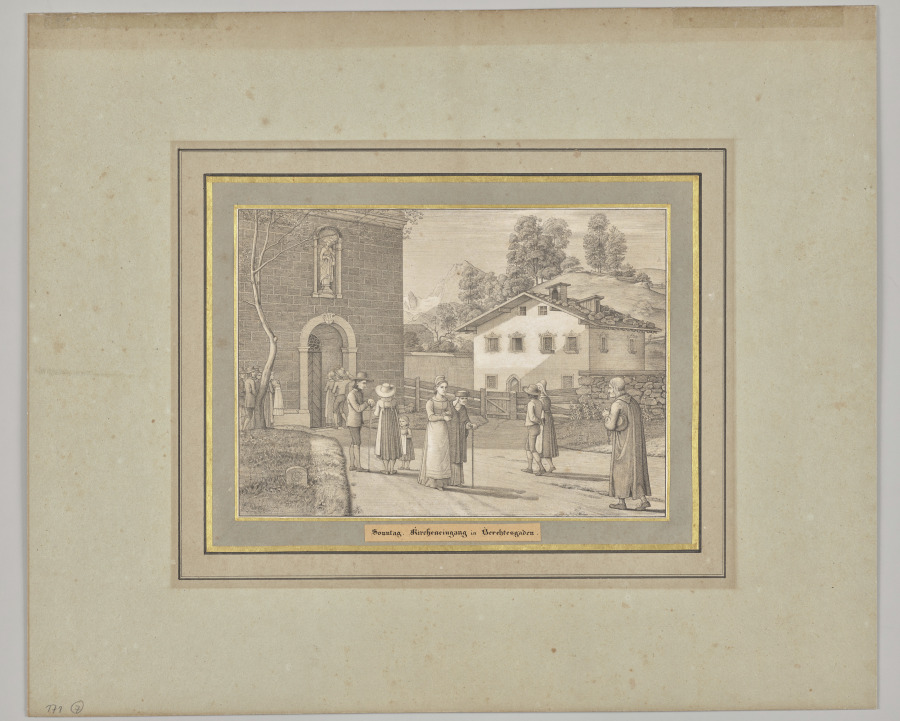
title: Sunday. Church entrance in Berchtesgaden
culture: Germany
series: Seven Areas from Salzburg and Berchtesgaden. Arranged according to the seven days of the week, connected by two allegorical sheets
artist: Ferdinand Olivier (German, 1785–1841)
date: 1818–23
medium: lithograph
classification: Print